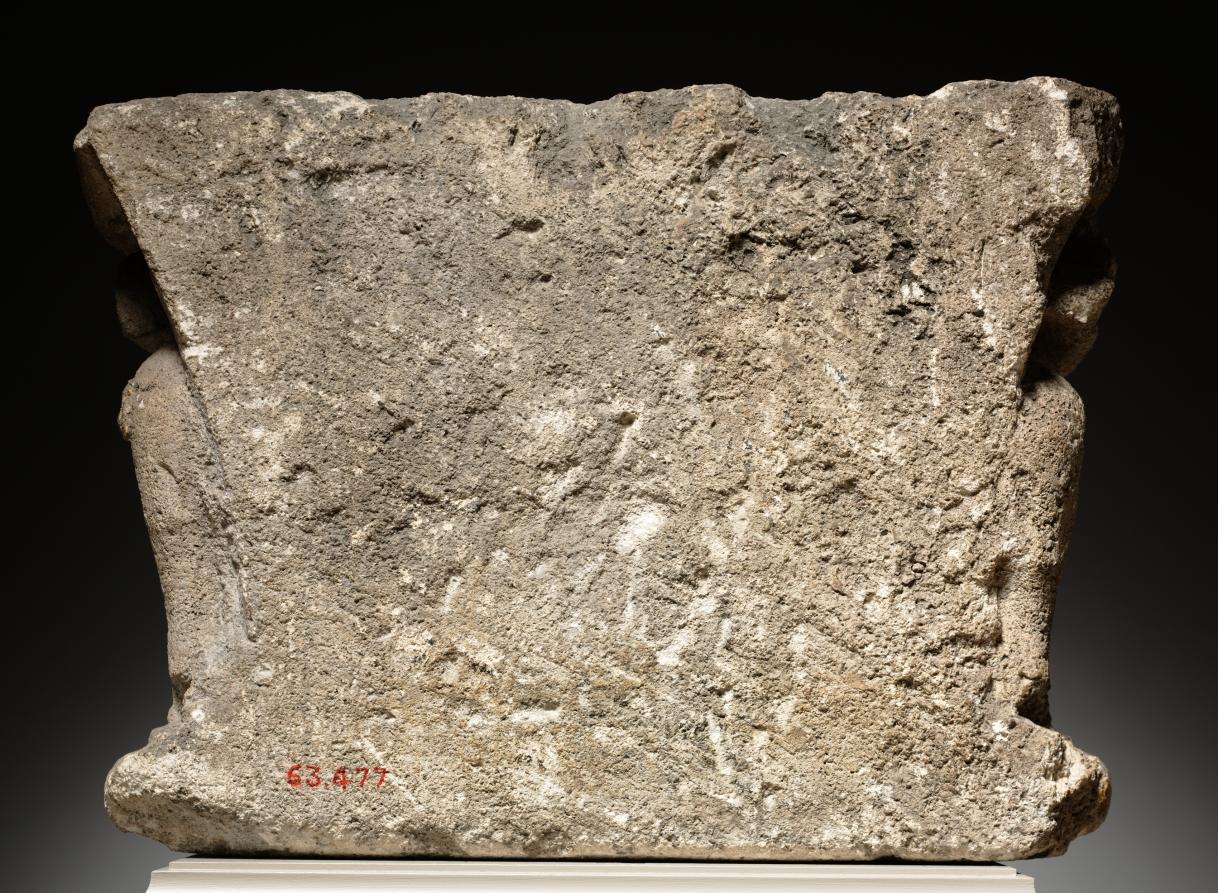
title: Engaged Capital with a Supporting (Caryatidal) Figure Flanked by Lions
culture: Western France, Vendée or Angoulême?, 12th century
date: c. 1125–1150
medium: limestone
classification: Sculpture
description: This sculpture is an excellent example of the Romanesque sculptor’s ability to accommodate his subject to the format of the capital. Much of the artistic quality of this work derives from the skillful contrast and balance of rounded solids, deep voids, and shallow prismatic hollows. It also illustrates the love of fanciful subject matter in largely religious contexts. A capital is essentially the top element of a column, usually carved, that acts as a mediator between the column and the load it supports. In this way, the subject of this capital serves as a metaphor.